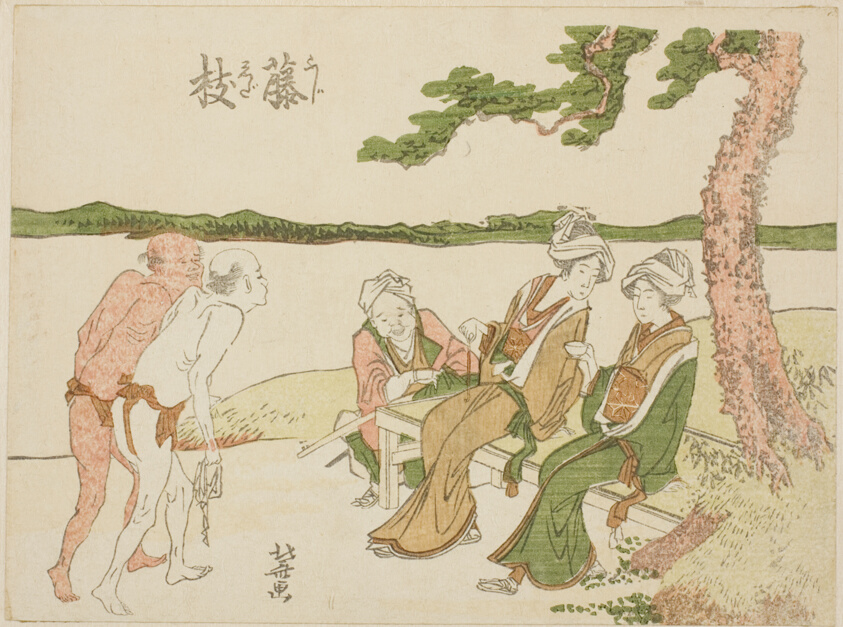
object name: Print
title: Fujieda station on the Tokaido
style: Japanese (culture or style)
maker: Katsushika Hokusai 葛飾 北斎; Japanese, 1760-1849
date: c. 1796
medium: Color woodblock print; surimono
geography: Japan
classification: woodblock print; print; asian art